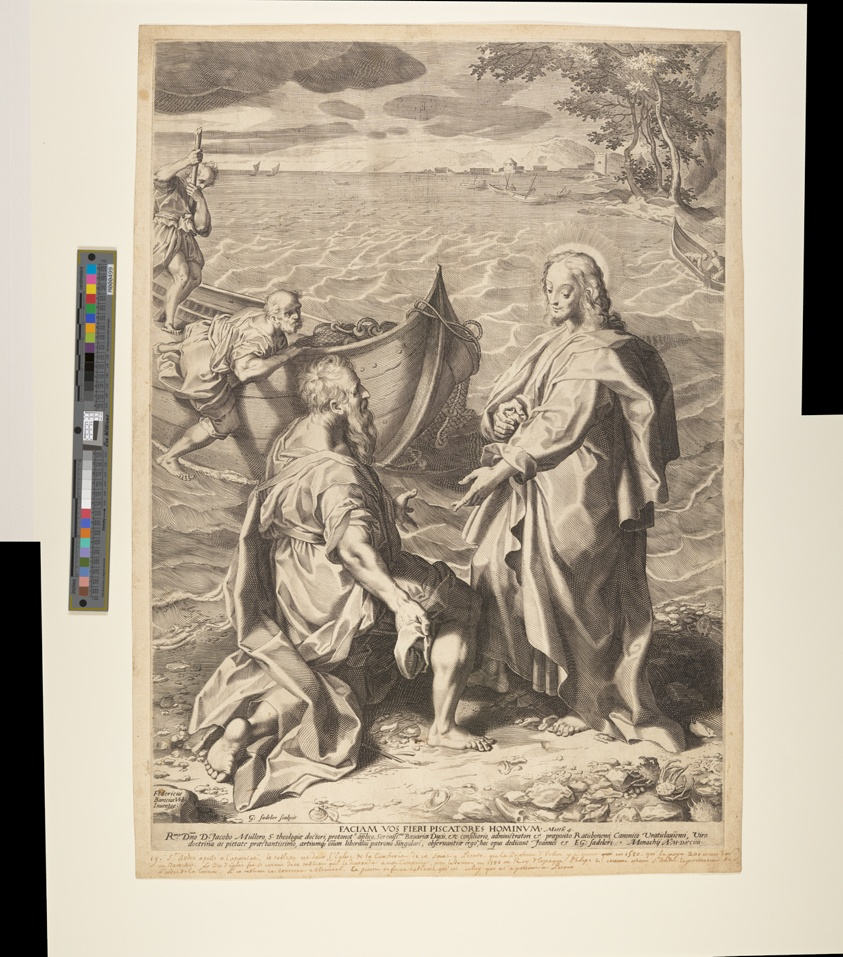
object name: Print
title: Calling of the Disciples Peter and Andrew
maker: Aegidius Sadeler II (Flemish, c. 1570–1629); after Federico Barocci (Italian, 1535–1612)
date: 1594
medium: Engraving on ivory laid paper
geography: Flanders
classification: engraving; paper; print; prints and drawing